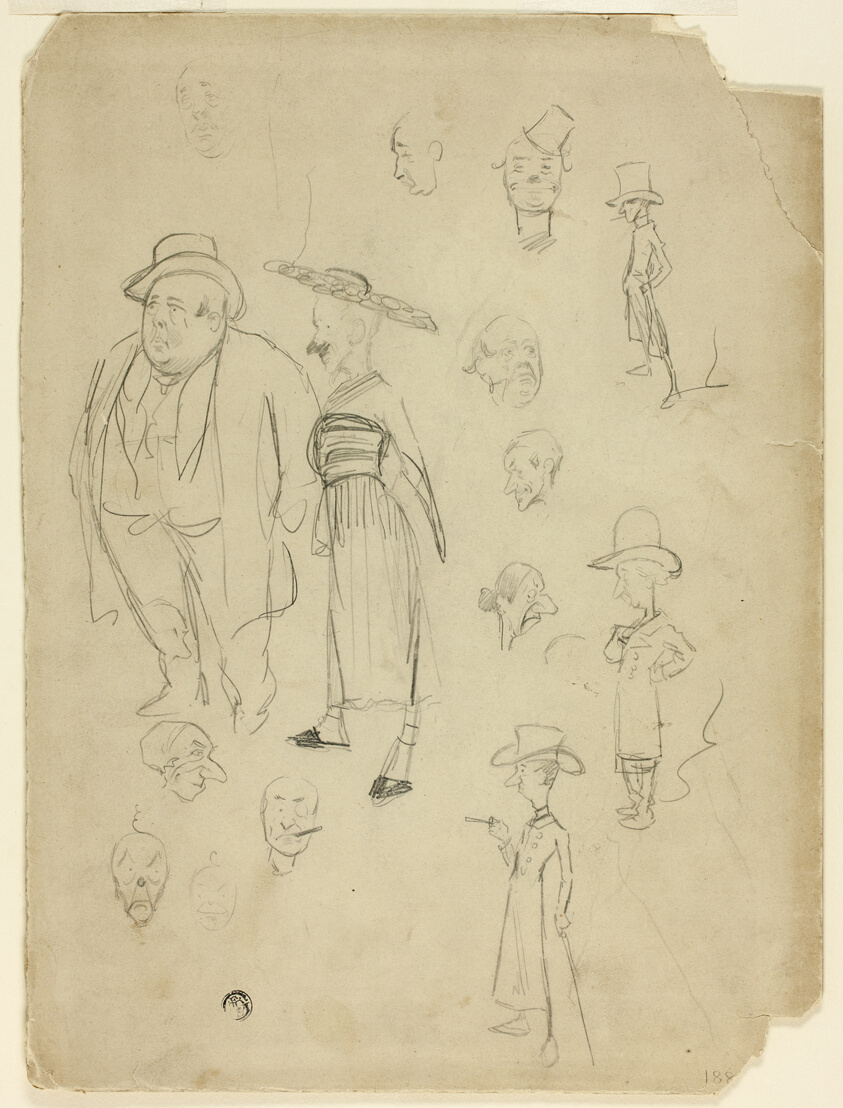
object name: Drawing and Watercolor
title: Caricatures of Gentlemen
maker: Philipp William May; English, 1864-1903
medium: Graphite on tan wove board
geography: England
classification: graphite; drawings (visual works); prints and drawing